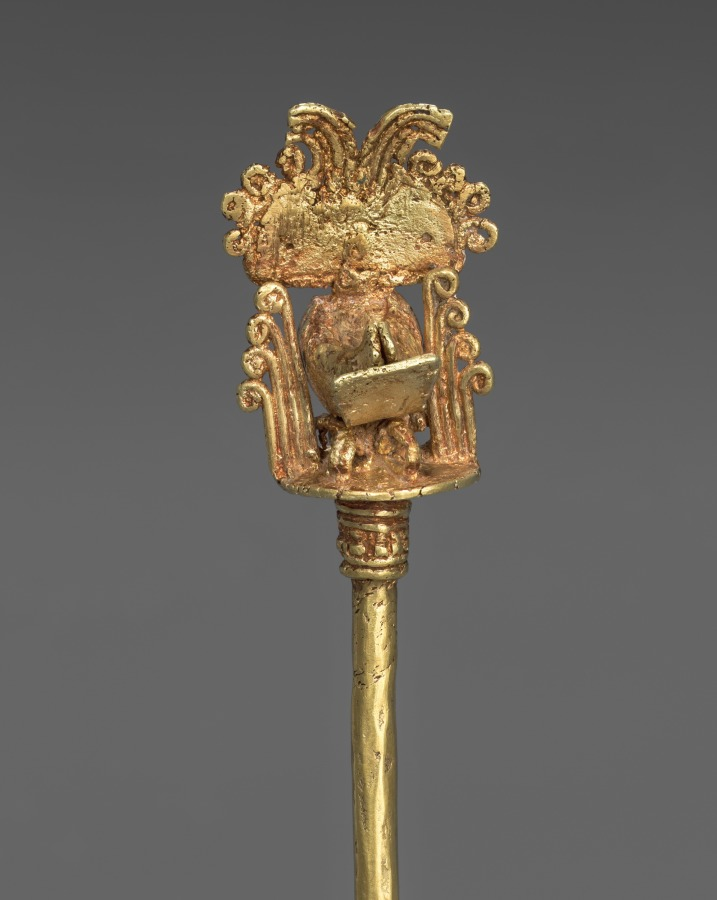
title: Lime Dipper or Pin with Owl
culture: Isthmian Region (Colombia), Calima, Yotoco period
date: 1–800 CE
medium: gold, cast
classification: Metalwork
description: An engaging miniature owl forms the finial of this dipper, which was used during coca-chewing rituals. Typically, coca leaves were chewed into a quid; then, with a dipper, lime made from powdered seashells was added to the quid to enhance the leaves' gentle stimulating effects. Contemporary natives regard coca as crucial to creating both social camaraderie and communion with supernatural forces; the same may have been true in the past.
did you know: Chewing coca leaves remains popular among indigenous communities in the Andean region.